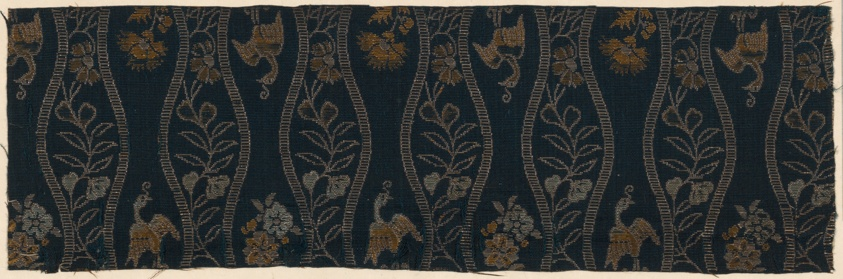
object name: Textile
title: Fragment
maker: Japan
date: 18th/19th century, Edo period (1615–1868)/ Meiji period (1868–1912)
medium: Single plain compound cloth, silk & silvered paper; 3 strips to m.m.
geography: Japan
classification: textile; weaving